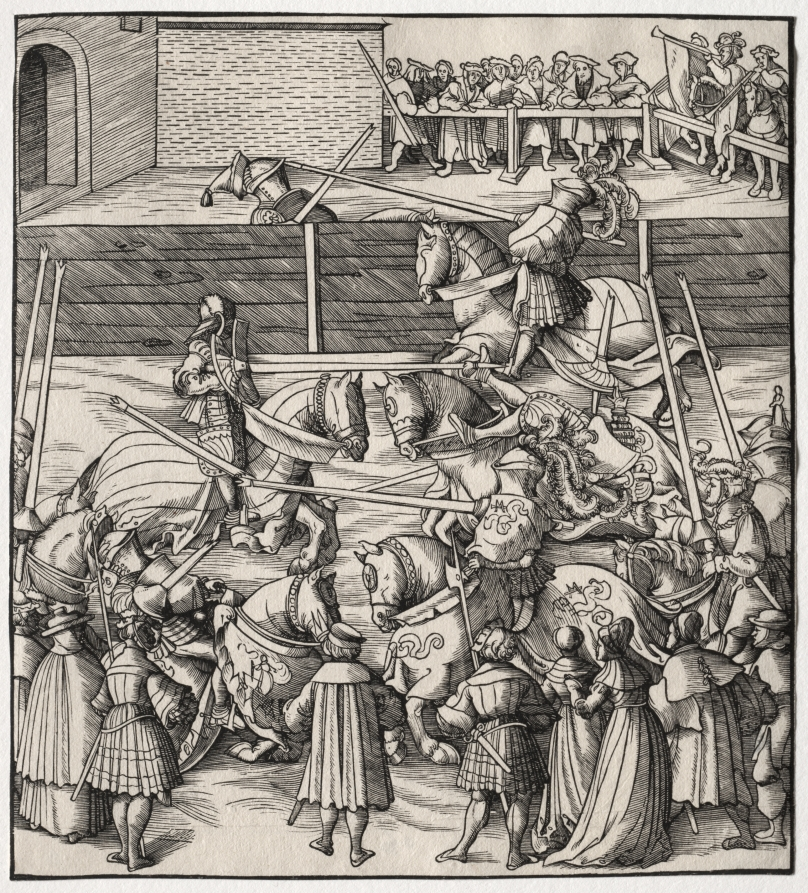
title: The Art of Jousting and Tilting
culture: Germany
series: Der Weisskunig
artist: Leonhard Beck (German, c. 1480–1542)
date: 1513–1518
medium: woodcut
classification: Print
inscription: VERSO, center, in pen and brown ink: [illegible] ; lower left, in graphite: 48 / 06 ; lower right, in pen and brown ink: [illegible] ; lower right, in graphite: 2.